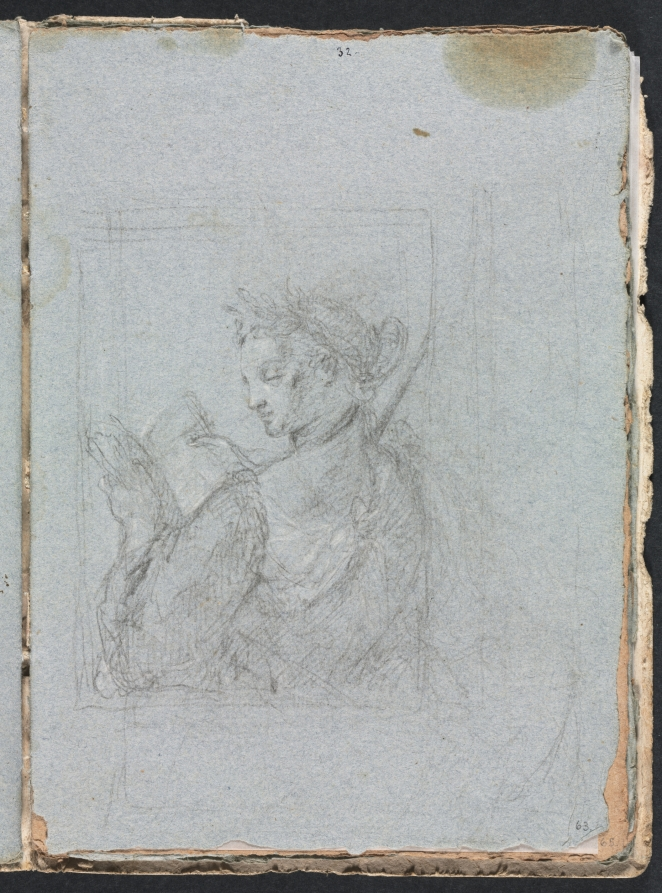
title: Verona Sketchbook: Female figure with open book (page 63)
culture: Italy, 18th century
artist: Francesco Lorenzi (Italian, 1723–1787)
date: 1760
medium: black chalk with white heightening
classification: Bound Volume